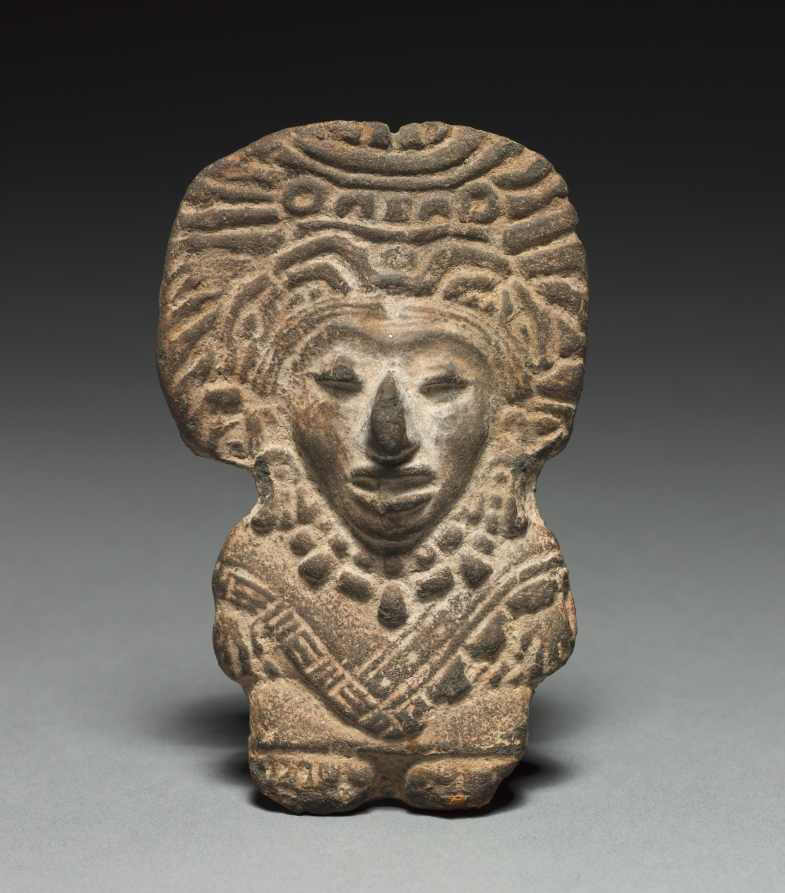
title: Idol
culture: Mexico, Oaxaca, La Mixteca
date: before 1942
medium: terracotta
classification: Sculpture